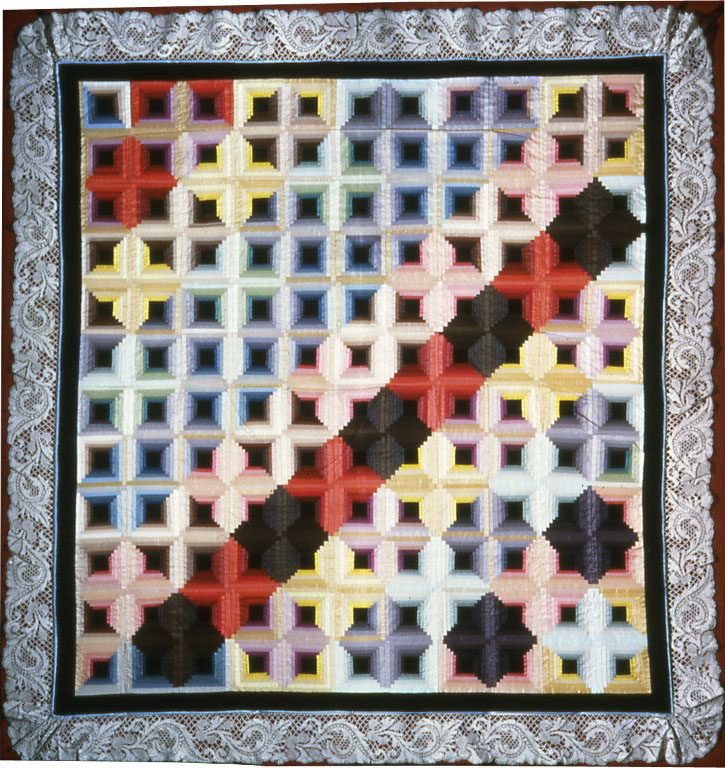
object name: Textile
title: Bedcover (Log Cabin Quilt)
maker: United States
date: 1875/1900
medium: Silk, pieced plain weaves and cut solit velvet; backed with silk, plain weave; edged with linen, bobbin straight lace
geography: United States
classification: textile; needlework (visual works); needlework - quilt